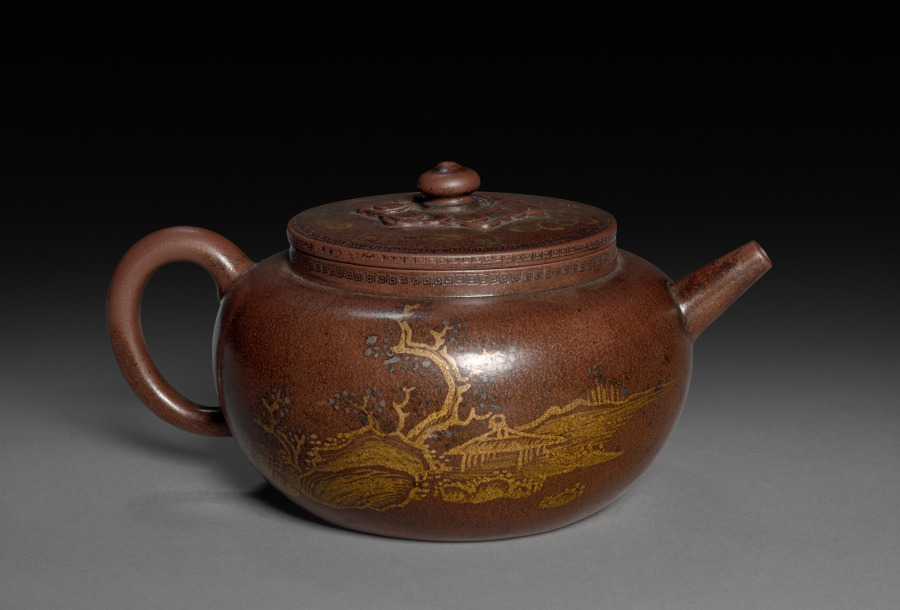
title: Teapot with Landscape and Imperial Poem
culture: China, Jiangsu province, Yixing, Qing dynasty (1644–1911), Qianlong reign (1736–95)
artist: Chen Hanwen (Chinese, active c. 1720s–90s)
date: 1762–95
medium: Stoneware, with gold pigment, Yixing ware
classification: Ceramic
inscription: 陳漢文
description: This teapot with a polished surface shows an imperial poem in gold on one side and a landscape on the other. The poem in archaic seal script was composed by the Qianlong emperor on his third southern inspection tour in 1762, when he traveled to southern China to solidify his rule. The base bears a stamped seal of its maker. Yixing potters produced teapots primarily for Ming dynasty literati-officials who valued simplicity and restraint, until the early Qing emperors introduced them at court.